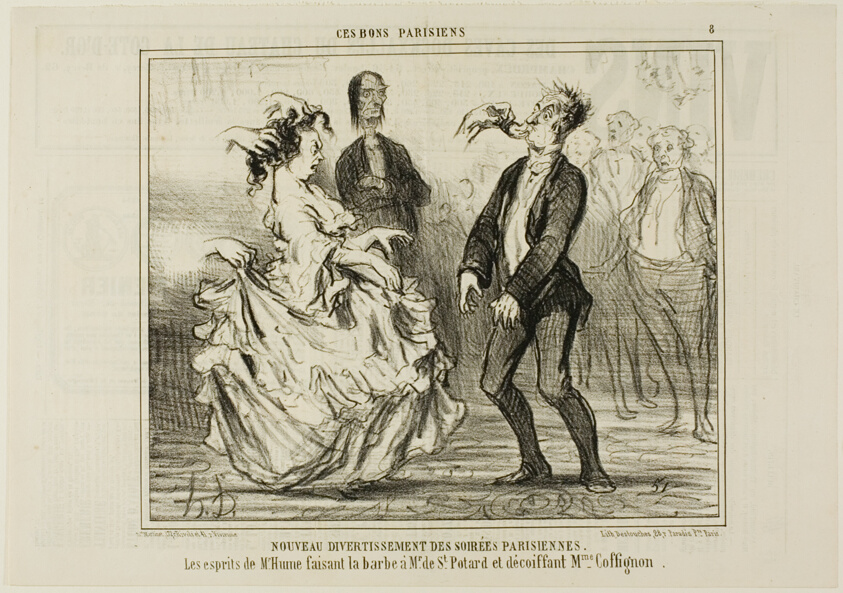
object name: Print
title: New Entertainment at the Parisian Evening Parties. The spirit of Mr. Hume shaving the beard of Monsieur de St. Potard and undoing the hair of Madame Coffignon, plate 8 from Ces Bons Parisiens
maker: Honoré Victorin Daumier; French, 1808-1879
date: 1857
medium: Lithograph in black on ivory wove paper, with letterpress verso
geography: France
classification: lithograph; print; prints and drawing